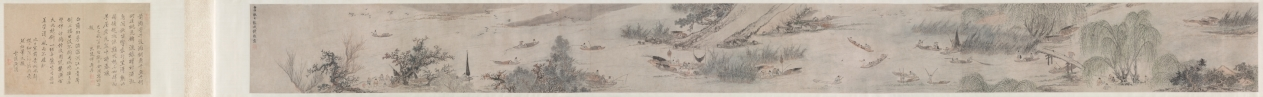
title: Fisherman's Joy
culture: China, Ming dynasty (1368–1644)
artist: Qian Gu (Chinese, 1508–c. 1578)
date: 1572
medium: Handscroll; ink and light color on paper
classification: Painting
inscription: Artist's inscription, signature, and seal: On the autumn day of the jen-shen year [1572], P'eng-ch'eng, Ch'ien Ku painted [this]. [seal] Hsüan-ch'ing shih. 2 colophons, both dated 1689, and 5 additional seals of Yün Shou-p'ing (1633-1690).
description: This painting has a scene showing two small crafts, each manned by two fishermen, practicing a traditional fishing method. In one of them, a man uses a bamboo pole to direct the movements of a cormorant bird sent into the water. Cormorant fishing, witnessed in some areas of the lower Yangzi River, appears in Zhe school paintings. Qian Gu may have borrowed these narrative figure scenes from Zhe school paintings, while his vantage point, brushwork, and soft tones align with the Wu school style. Scenes of fishermen appealed to urban and educated audiences who idealized the self-sufficient independence of fisherfolk.